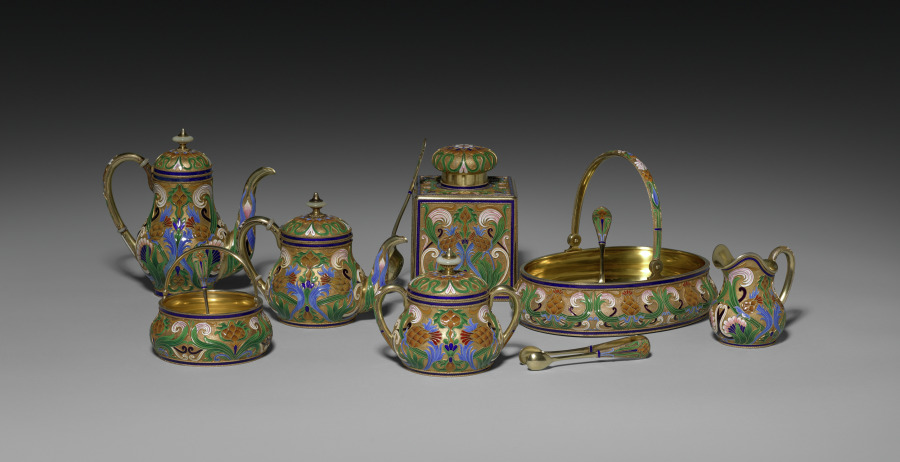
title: Tea Service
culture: Russia, St. Petersburg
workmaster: attributed to Feodor Ivanovich Rückert (Russian, 1840–1917)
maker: House of Fabergé (Russian, 1842–1918)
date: 1887–96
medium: silver gilt, opaque cloisonné enamel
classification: Miscellaneous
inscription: Various marks.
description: Fabergé’s craftsmen in Moscow, especially under the watchful eye of workmaster Feodor Rückert, became known for their work in the pan-Slavic or neo-Russian style, hearkening back to 17th-century motifs of Russian folk art. Often on rather conventional shapes, Rückert and his silversmiths created an explosion of color, achieved through the historic technique of cloisonné enamel in which tiny metal lines are soldered to the surface then filled with glass powders in various colors and fired to create a high gloss finish. The result is a spectacular evocation of the 17th-century originals. Far from mere copies, however, Rückert's designs, such as this tea service, employ naturalistic or abstract motifs in a thoroughly modern adaptation of a remarkable earlier period of Russian art and decoration.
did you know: This tea service still retains its large wooden presentation box.